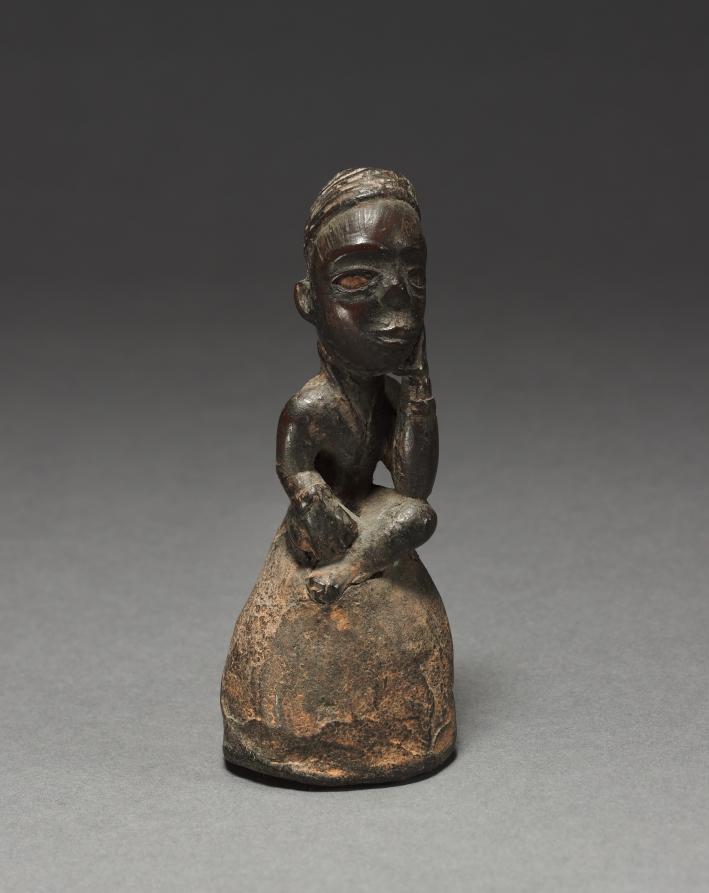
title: Power figure (nkisi)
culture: Africa, Central Africa, Republic of the Congo, Kongo-style maker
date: late 1800s-early 1900s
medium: Wood, organic materials (including resin), cloth, glass, and various other materials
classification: Sculpture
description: One of seven anthropomorphic figurines, these minkisi contained medicines in which an ancestral spirit was believed to reside. The medicines served a metaphorical rather than literal purpose in the resolution of conflicts among Kongo people. This asymmetrical figure wears a mpu headdress of chiefs with its characteristic geometric decoration. The pose may refer to a state of mourning.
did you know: Different from other Minkisi who hold their power in their abdomen, this figure sits atop a sphere in which the active substances still reside.